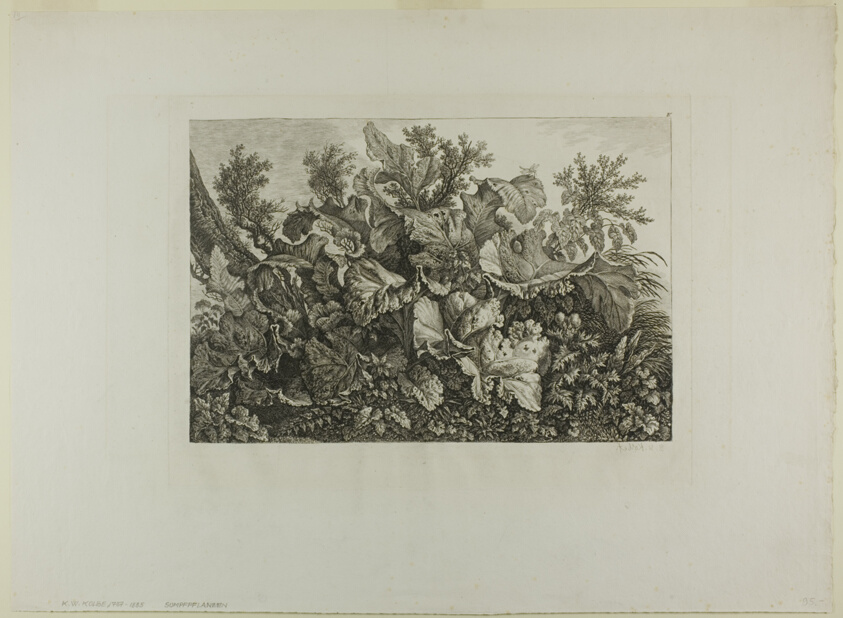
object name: Print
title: Swamp Plants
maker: Carl Wilhelm Kolbe, the elder (German, 1759-1835)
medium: Etching on paper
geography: Germany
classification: etching; print; prints and drawing